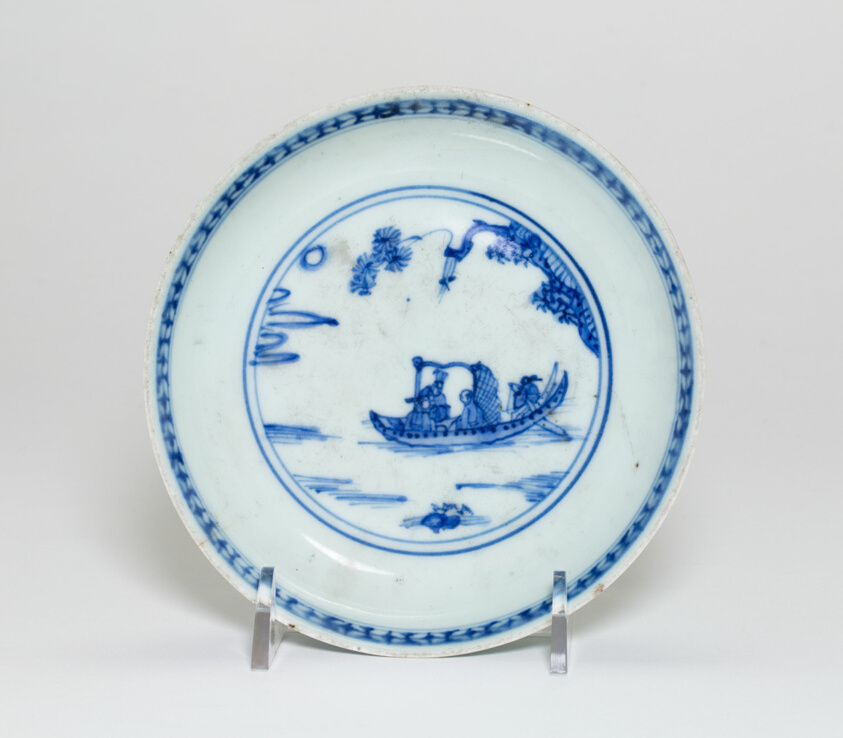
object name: Vessel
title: Plate with Figures on a Boat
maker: China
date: Ming dynasty (1368–1644) Hongwu reign mark and period (1368–1398)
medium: Porcelain painted in underglaze blue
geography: China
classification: porcelain; ceramics; asian art